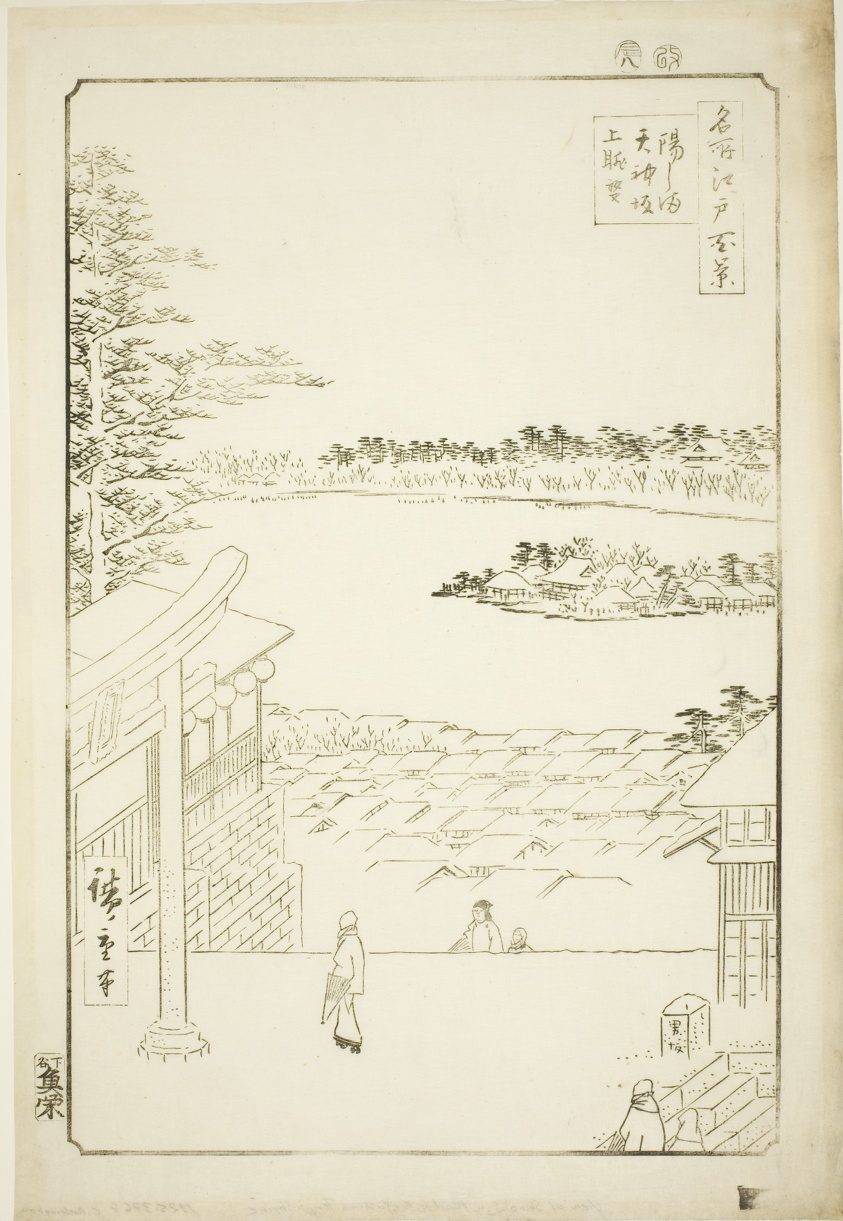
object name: Print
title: Hilltop View from Yushima Tenjin Shrine (Yushima Tenjin sakaue tenbo), from the series "One Hundred Famous Views of Edo (Meisho Edo hyakkei)"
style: Japanese (culture or style)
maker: Utagawa Hiroshige 歌川 広重; Japanese, 1797-1858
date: 1856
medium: Woodblock print; oban, keyblock proof impression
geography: Japan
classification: woodblock print; print; asian art; woodblock